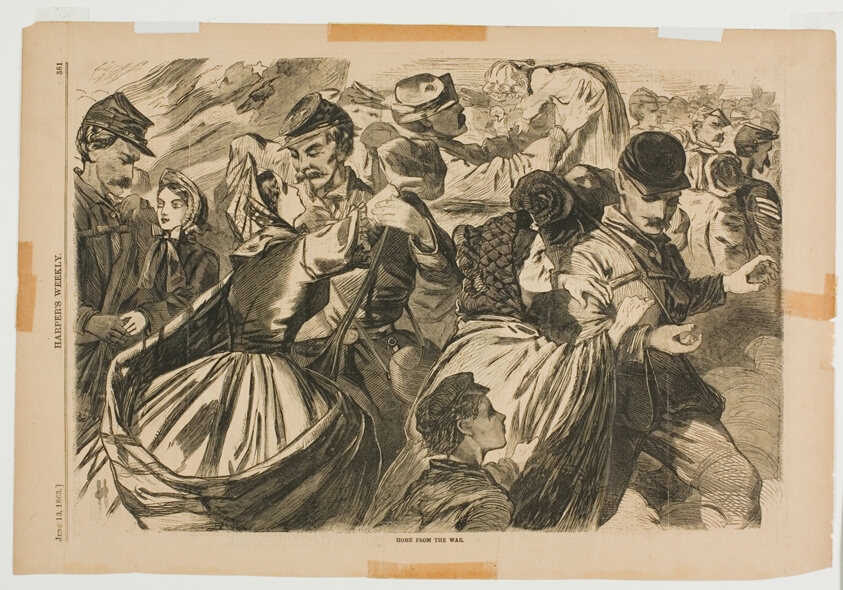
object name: Print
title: Home From the War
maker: Winslow Homer (American, 1836-1910); published by Harper's Weekly (American, 1857-1916)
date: published June 13, 1863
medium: Wood engraving on paper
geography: United States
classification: wood engraving; print; prints and drawing